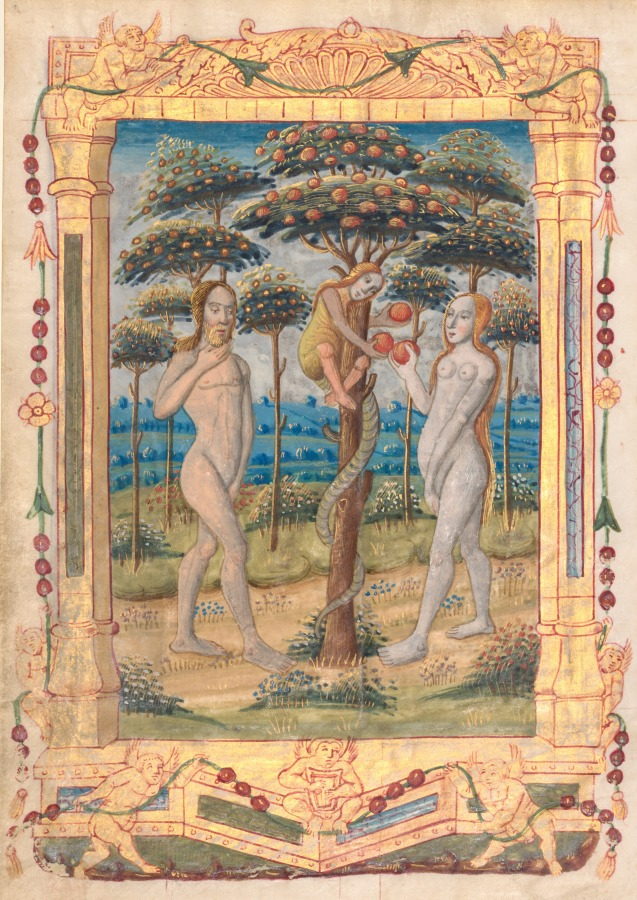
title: Leaf from a Book of Hours: Adam and Eve and the Fall of Man (Prefatory Miniature to the Office of the Virgin) (recto) and Text with Illustrated Border (verso) (1 of 3 Excised Leaves)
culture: France, Rouen, 16th century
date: c. 1510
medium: ink, tempera, and liquid gold on vellum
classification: Manuscript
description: This leaf came from a highly customized and lavish book of hours made in Rouen, a major center for book production at the time. Intended for a female patron, the book, of which the museum owns three leaves, contained numerous illuminations. Shown here are Adam and Eve, the first man and woman, just before disobeying God by eating fruit from the forbidden tree of knowledge in the Garden of Eden, considered the first sin in Christianity. This precedes the Hours of the Virgin’s traditional first scene of the Annunciation. Its inclusion emphasizes a need for redemption through recitation of the subsequent prayers.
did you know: This image opens to what is the heart of every book of hours, the Hours of the Virgin, a set of prayers in which the reader asked the Virgin Mary to intercede on their behalf.